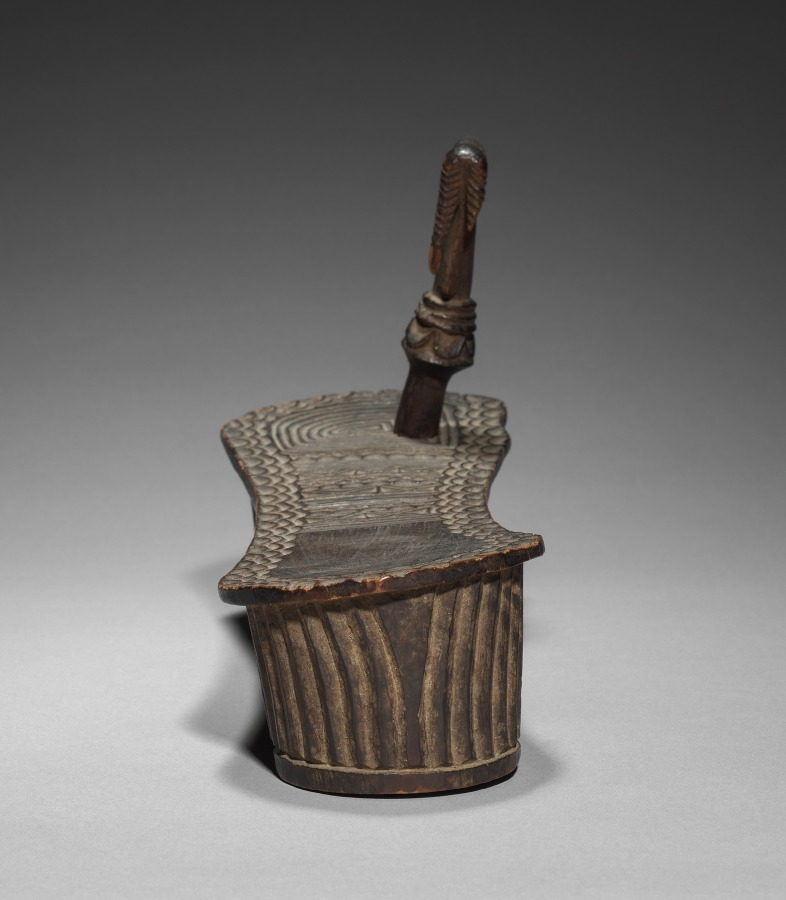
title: Sandal (mtalawanda / mtawanda) or Clog (kiatu cha mti)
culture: Africa, Central Africa, Democratic Republic of Congo, unidentified carver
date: c 1800s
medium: Wood and glass beads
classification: Wood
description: Common in the Indian Ocean region, wooden sandals changed meaning across place and time. This pair’s base elevates the foot as the toes grip an antelope-shaped peg (msuruaki). Crisp geometric sole designs suggest they were rarely worn. East African elites and merchants once had exclusive rights to wooden shoes, wearing elaborate ones only for portraits. Formerly enslaved people living along the coast wore simpler ones from the 1840s onward, adopting elite footwear to assert their liberation. However, slave traders like the Zanzibari “Tippu Tip” (c. 1832–1905) likely brought mitalawanda to Central Africa; stylistic elements of this pair hail from that region.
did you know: This distinctive footwear traveled from Southeast Asia and the Middle East to Africa, first to the Swahili Coast and then further inland to parts of Central Africa. The deity Krishna wears similar shoes (paduka) in an eighteenth-century Indian miniature painting (2003.344).